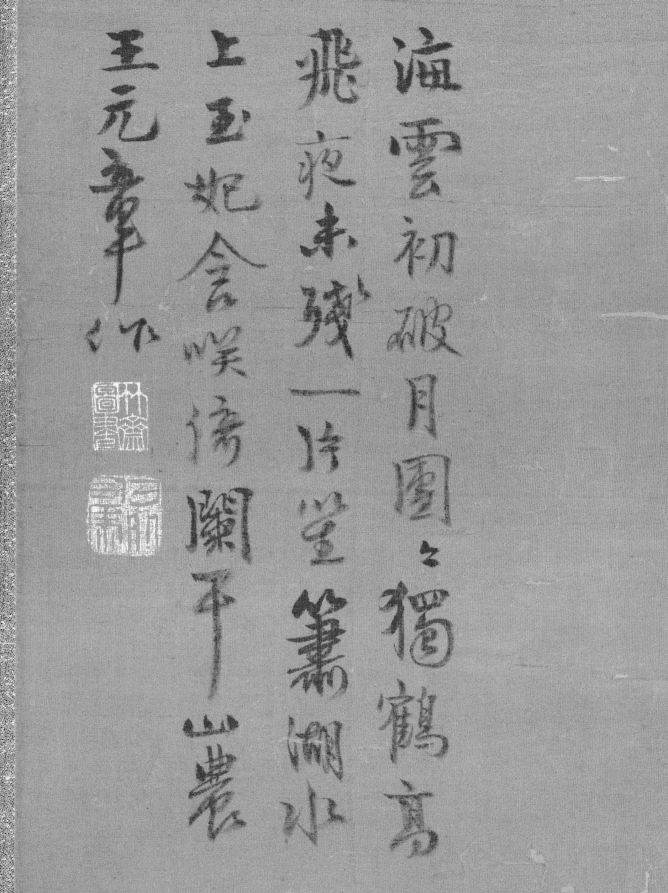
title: A Prunus in the Moonlight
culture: China, Yuan dynasty (1271-1368)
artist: Wang Mian (Chinese, 1287–1359)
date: 1300s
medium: Hanging scroll; ink on silk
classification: Painting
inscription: 8 additional seals: 6 of the Qianlong 乾隆 emperor (r. 1736-95); 2 of Dong Gao 董誥 (1740-1818).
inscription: 海雲初破月團團，獨鶴高飛夜未殘。/ 一片笙簫湖水上，玉妃含笑倚闌干。 王元章作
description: The plum flourishes in the mild climate of the south, and it was not before the Six Dynasties period (220– 589 CE) that the motif began to be appreciated by southern artists, many of whom had emigrated from the north. Wang Mian from Zhejiang province had failed the civil and military service examinations and later rejected appointments under the Mongol government. Instead, he chose to return home, making a living by selling plum paintings. Few of Wang’s works have survived, but they demonstrate that by his time the ink-plum (momei) genre was fully developed.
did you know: The painting portrays the plum in the nighttime, as indicated by the tint of the background and the presence of the moon.